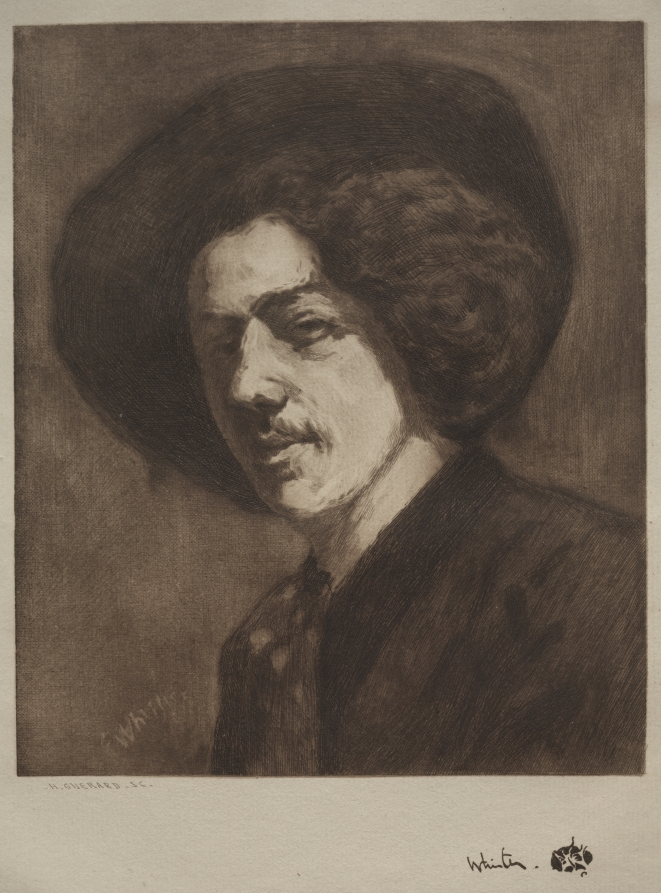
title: James McNeill Whistler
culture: France, 19th century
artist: Henri Charles Guérard (French, 1846–1897)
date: 1888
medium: etching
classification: Print